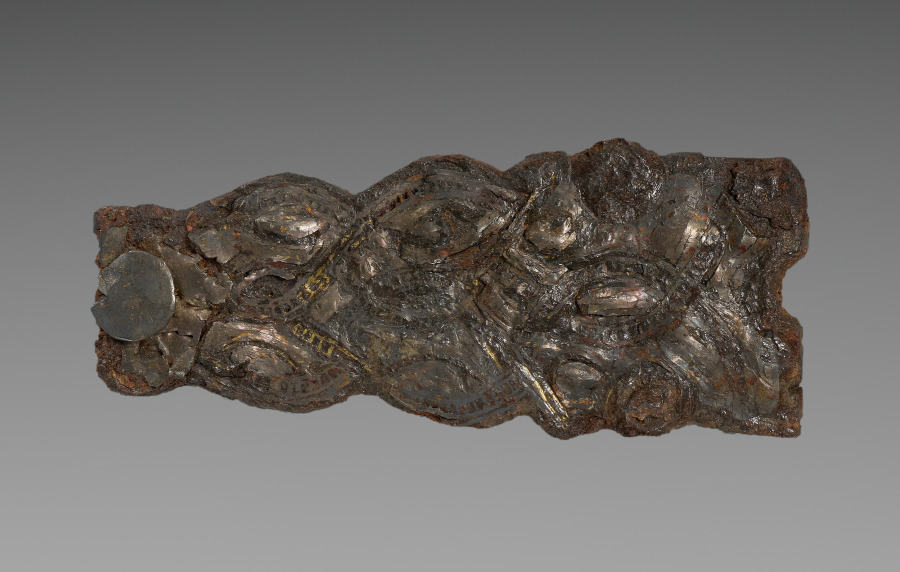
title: Buckle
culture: Merovingian, Burgundian, Migration period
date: 600s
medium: iron with silver overlay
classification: Jewelry